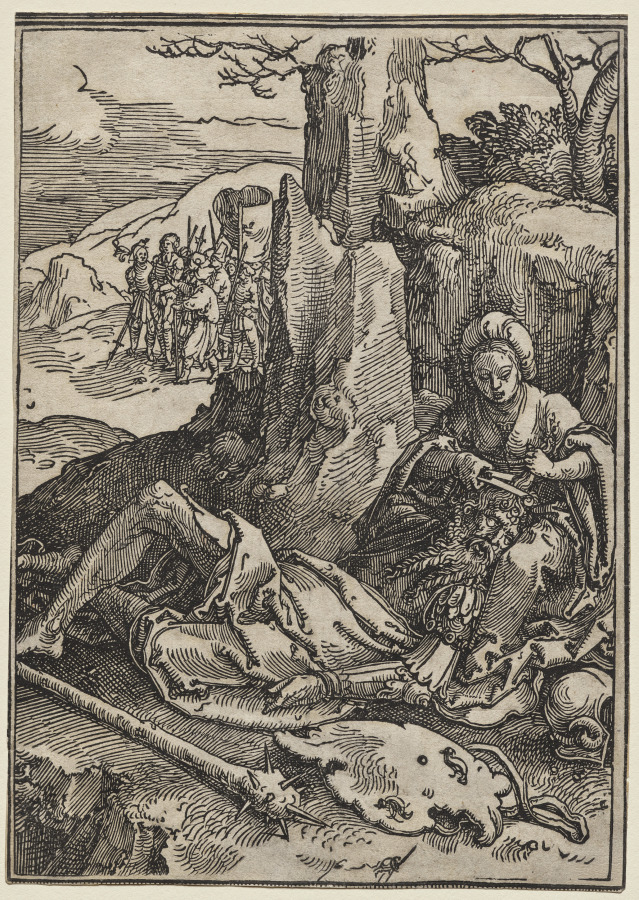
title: The Power of Women: Samson and Delilah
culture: Netherlands, 16th century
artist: Lucas van Leyden (Netherlandish, 1494–about 1533)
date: 1516–1519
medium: woodcut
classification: Print